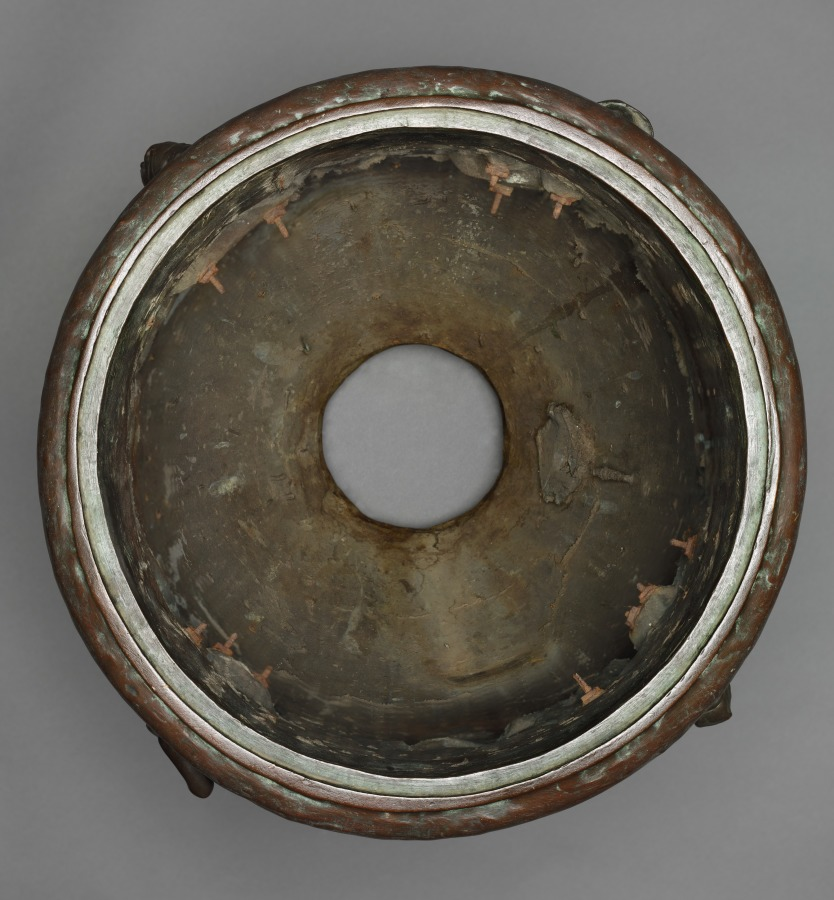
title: Vase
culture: France, 19th century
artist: Gustave-Joseph Chéret (French, 1838–1894)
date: c. 1890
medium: bronze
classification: Sculpture